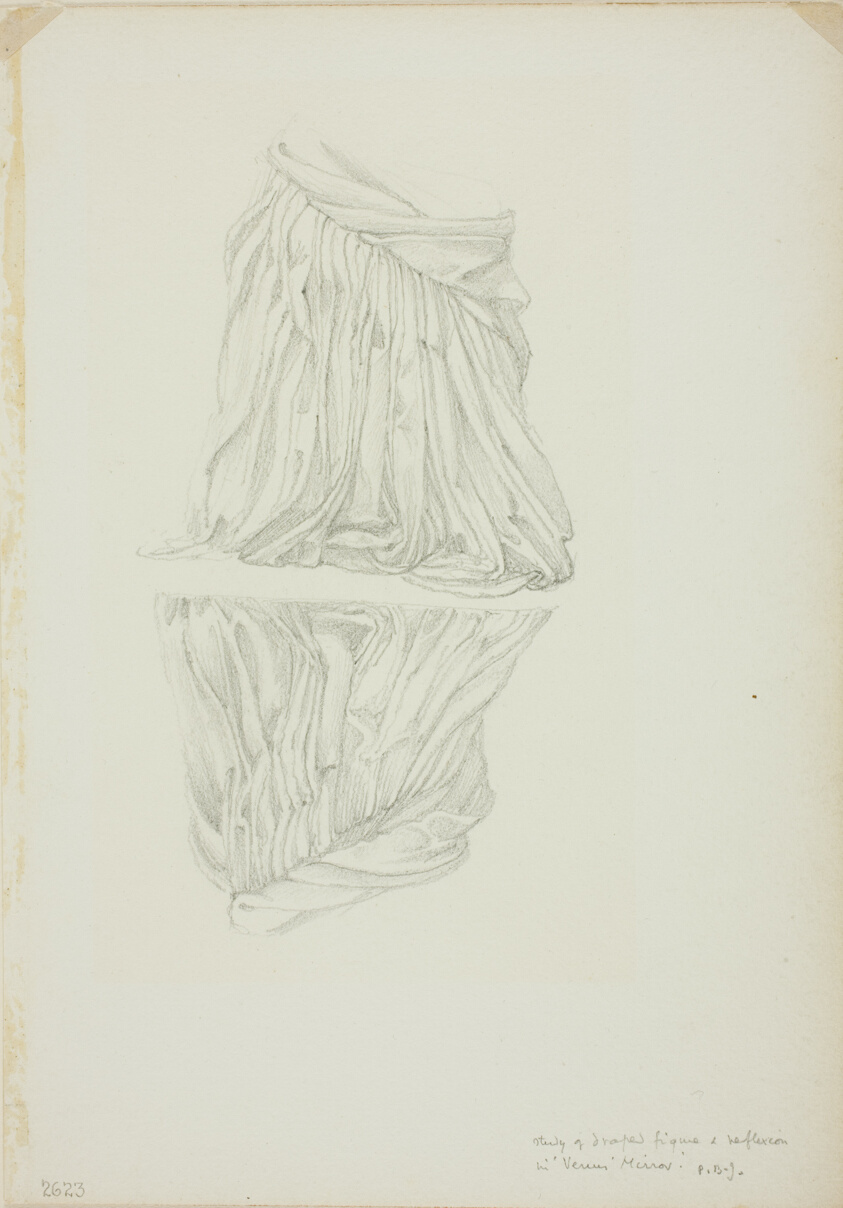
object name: Drawing and Watercolor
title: Draped Figure and Reflection, study for Mirror of Venus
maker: Sir Edward Burne-Jones (English, 1833-1898)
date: c. 1873–77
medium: Graphite on ivory wove paper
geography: England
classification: graphite; drawings (visual works); prints and drawing